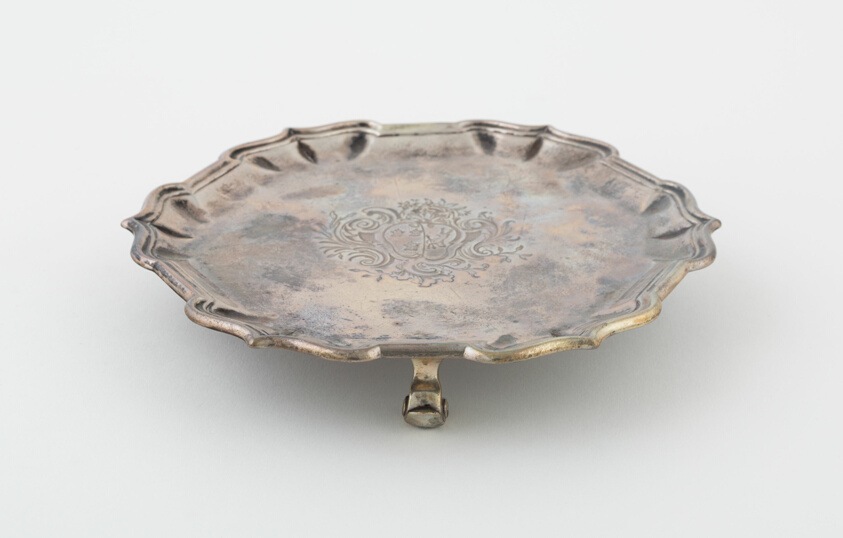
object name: Metalwork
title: Waiter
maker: Edward Feline; English, active 1720-53; London, England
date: 1738/39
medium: Silver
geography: London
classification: silver; metalwork; european decorative arts